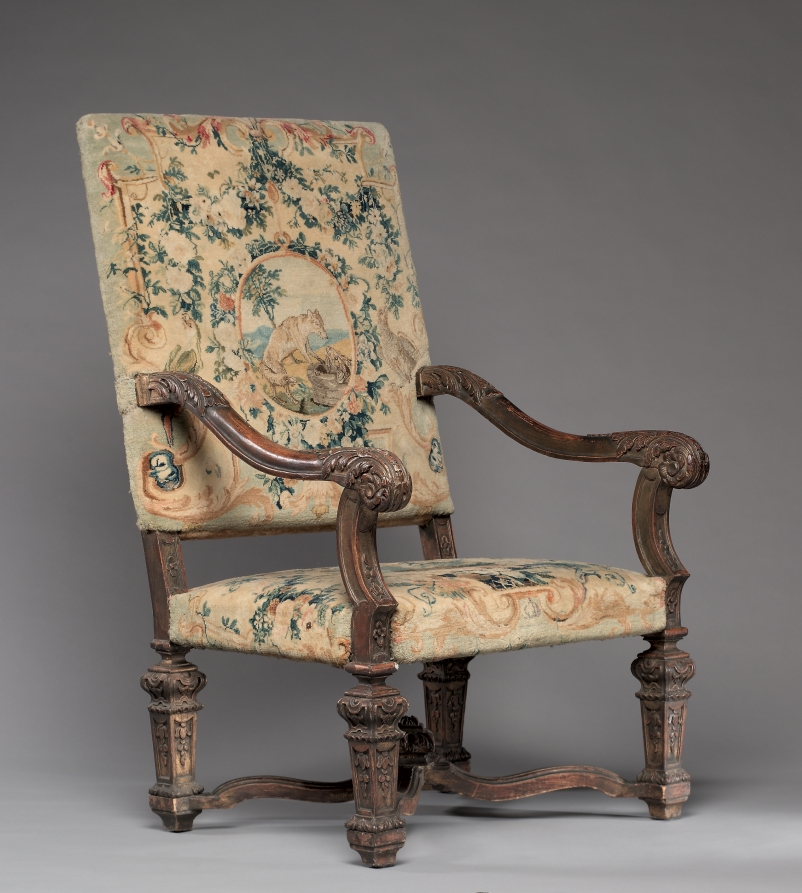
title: Armchair (2 of 4)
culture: France, 18th century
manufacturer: Royal Savonnerie Manufactory, Chaillot Workshops (French, est. 1627)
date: before 1717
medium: carved wood, Savonnerie knotted-pile (symmertrical rug knot) upholstery; wool, hemp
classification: Furniture and woodwork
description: These chairs belong to a suite that includes a settee (also in the CMA’s collection) and a tapestry made for a count and countess to mark their wedding in 1717. Furniture of this scale was usually placed against the wall in grand reception halls, more as a display of wealth than for use. Upholstered in Savonnerie tapestries, this suite was among the most treasured and expensive example anyone could own and typically reserved for royalty. To add decorative and intellectual interest to the textiles, weavers incorporated symbols depicting various stories from the Fables of Jean de La Fontaine, published from 1668 to 1694 and largely adapted from Aesop and other early storytellers.